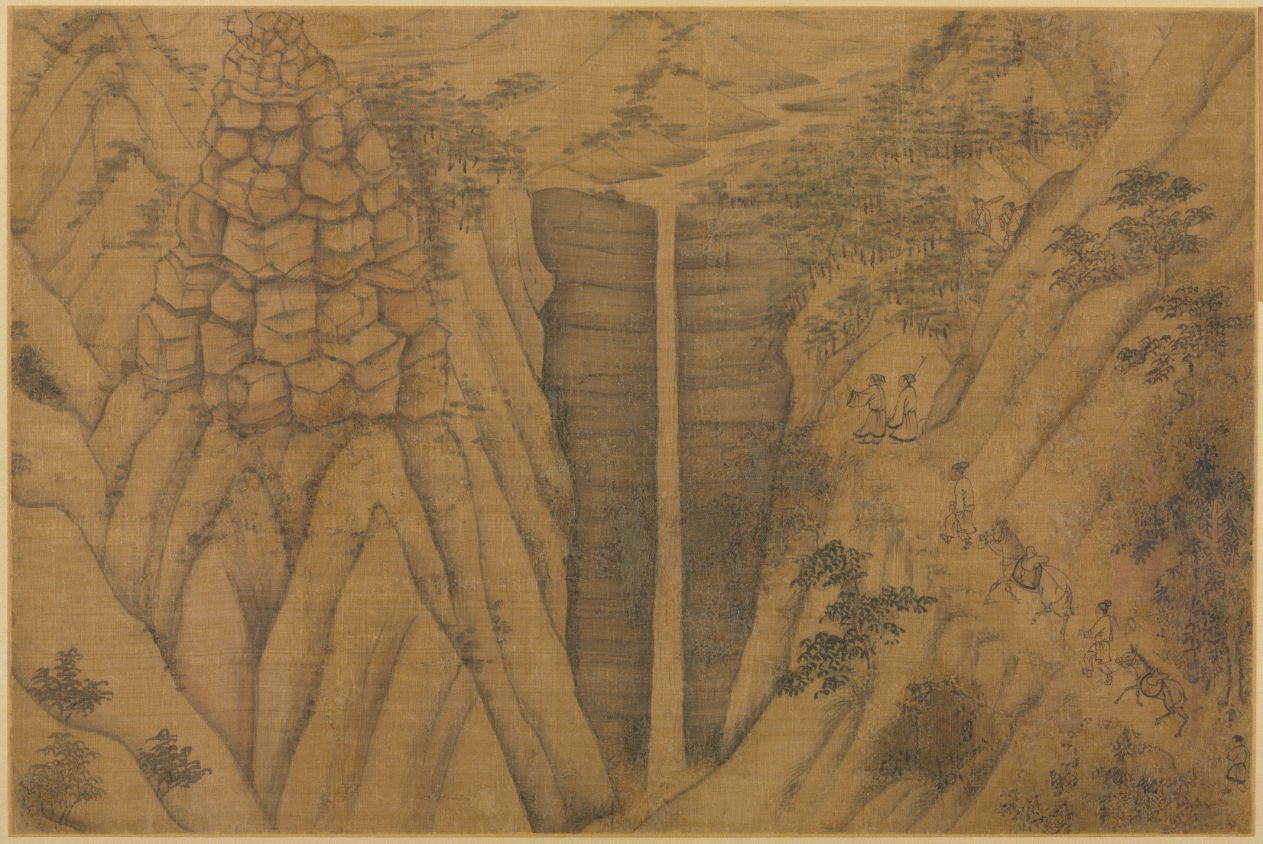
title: Dwelling in the Longmian ("Sleeping Dragon") Mountains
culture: China, Song dynasty (960-1279) - Yuan dynasty (1271-1368)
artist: follower of Li Gonglin (Chinese, c. 1049–1106)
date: 1100s-1200s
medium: handscroll mounted as an album leaf; ink and color on silk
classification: Painting